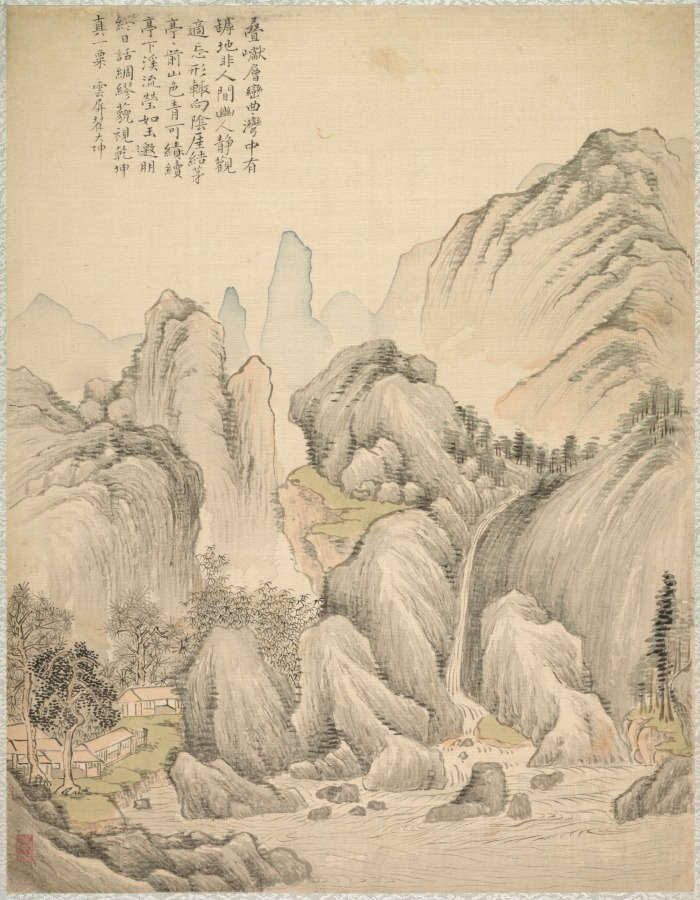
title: Folded Hills and Layered Peaks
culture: Japan, Edo period (1615–1868)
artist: Tsubaki Chinzan (Japanese, 1801–1854)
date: 1847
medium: album leaf; ink and color on silk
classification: Portfolio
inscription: Tsubaki Chinzan inscribed each leaf with the same inscription that Zhai Dakun wrote on his album leaves.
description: As the title of this album suggests, Tsubaki Chinzan painted each of the landscapes included in the album after interpretations of the styles of old masters by Chinese painter Zhai Dakun (翟大坤, active 1730–1804). In addition to the painted compositions, he also copied the inscriptions on Zhai Dakun's paintings.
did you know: Tsubaki Chinzan was inspired by Zhai Dakun's album, CMA 1986.49, which is dated to 1775.